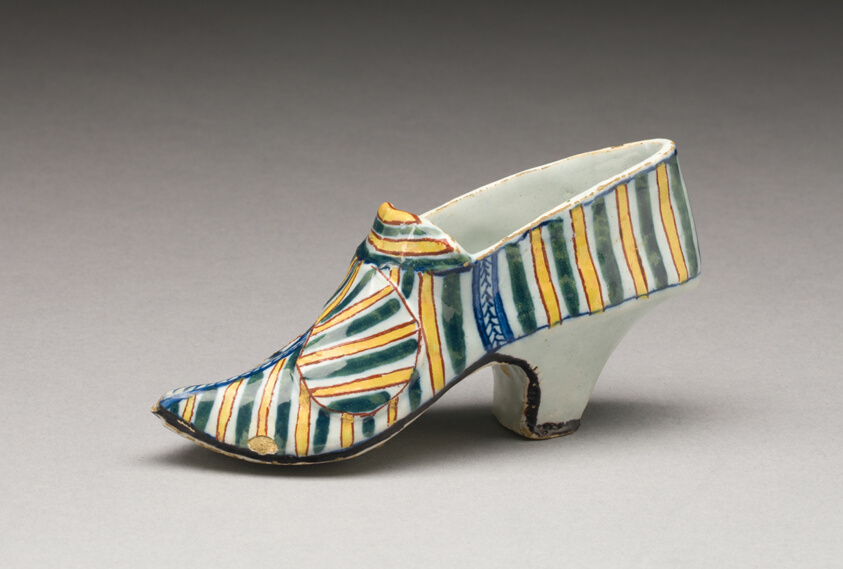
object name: Ceramics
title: Shoe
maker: Delft, Netherlands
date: c. 1750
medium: Tin-glazed earthenware (Delftware)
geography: Delft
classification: earthenware; ceramics; european decorative arts